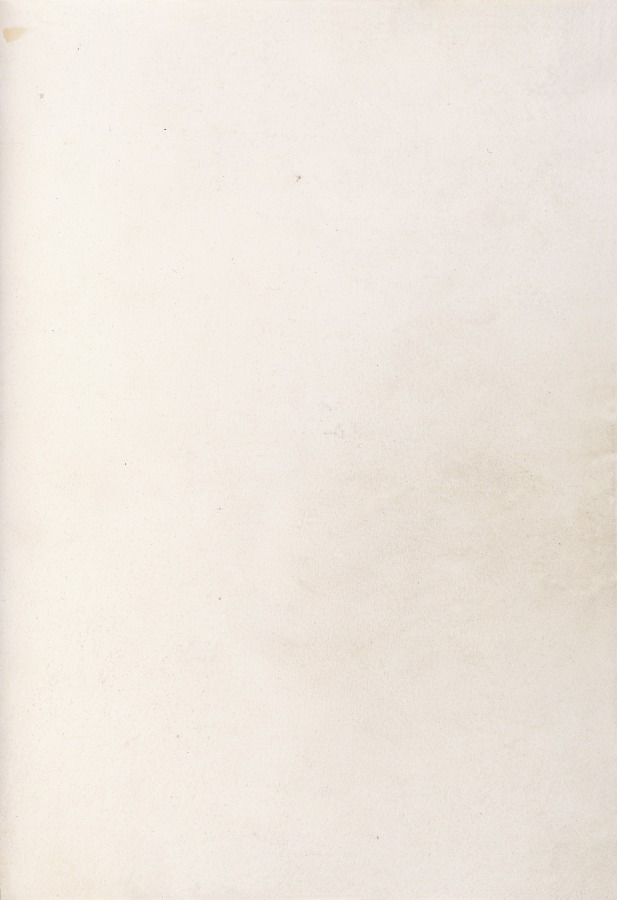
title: Hours of Queen Isabella the Catholic, Queen of Spain: Fol. 1r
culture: Flanders, Ghent and Bruges, late 15th century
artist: Master of the First Prayerbook of Maximillian (Flemish, c. 1444–1519)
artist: and Associates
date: c. 1500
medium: ink, tempera, and gold on vellum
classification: Bound Volume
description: This manuscript was illuminated by a circle of at least five highly organized manuscript painters active in the Flemish cities of Ghent and Bruges. The principal illuminator was Alexander Bening, who painted the majority of the book's miniatures. Manuscripts produced by this circle of artists are renowned for the decoration of their borders, which typically feature a rich variety of realistically painted flowers, birds, and butterflies. This prayer book, called a book of hours, was intended not for a cleric but for the private devotions of a lay person—in this case, Isabella the Catholic, Queen of Spain (1451–1504); her coat of arms embellishes the book's frontispiece. It is unlikely that the book was commissioned by the Queen herself; rather, she probably received it as a diplomatic gift from someone courting her patronage, perhaps Cardinal Francisco Jimenez de Cisneros. A Franciscan friar, Jimenez was dependent upon Isabella for his advancement, first to the post of Queen's confessor in 1492, and then to Archbishop of Toledo in 1495.